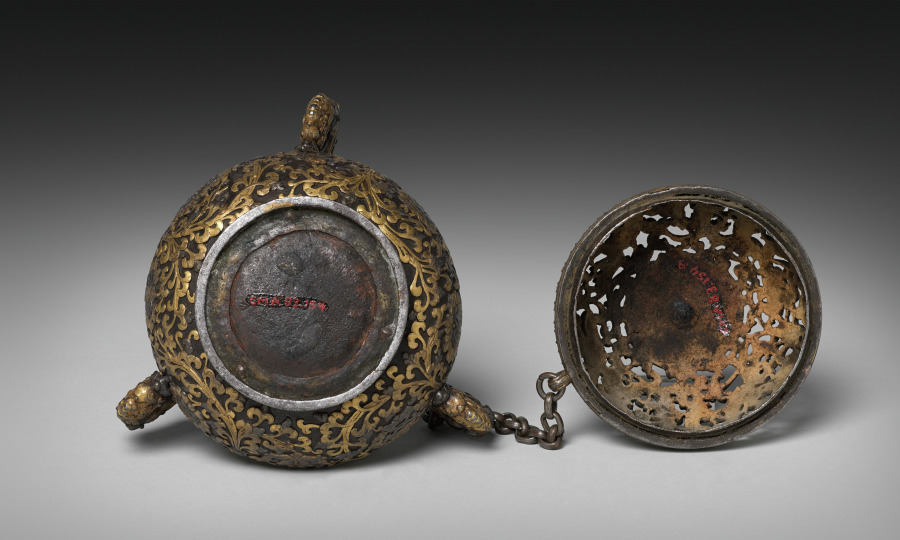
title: Incense Burner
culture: China, Yongle Period (1403-1424)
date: early 1400s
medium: iron inlaid with gold and silver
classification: Metalwork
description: This incense burner with gold and silver inlay has three dragon-head handles. Its main body is decorated with flowers placed in round fields formed by a winding creeper. The perforated cover is decorated with a dragon. The lotus bud on the top is used as a handle.